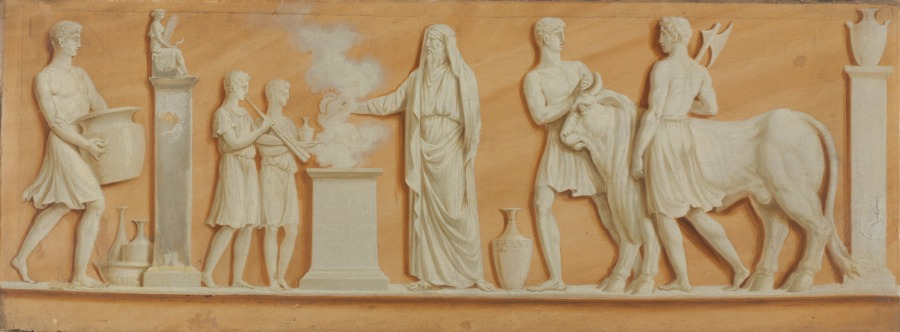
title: Overdoor Painting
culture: France, 18th century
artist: Pierre Rousseau (French, 1751–1829)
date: 1790s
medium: oil on canvas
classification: Painting